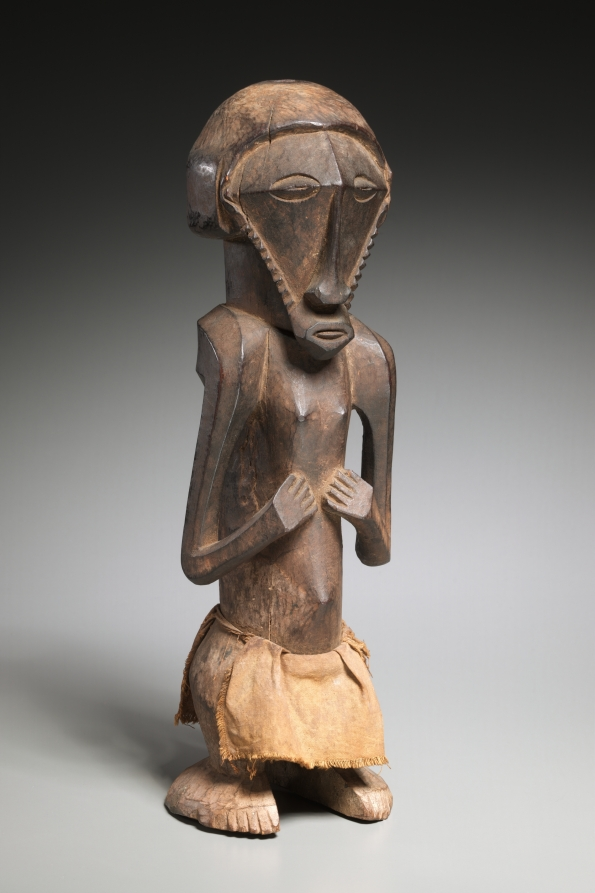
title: Shrine Figure (misi or mishi)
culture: Africa, Central Africa, Democratic Republic of Congo, pre-Bembe style or Boyo-style maker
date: late 1800s-early 1900s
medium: Wood and cotton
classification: Sculpture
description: This figure was used in an ancestral cult dedicated to the founders of small political groupings. Such figures were usually kept in the same shrine with a number of stylistically related male and female carvings that represented ancestors. At times of crisis, the custodian of the shrine spent the night in close proximity to the images, bringing offerings to the ancestors in exchange for their support.